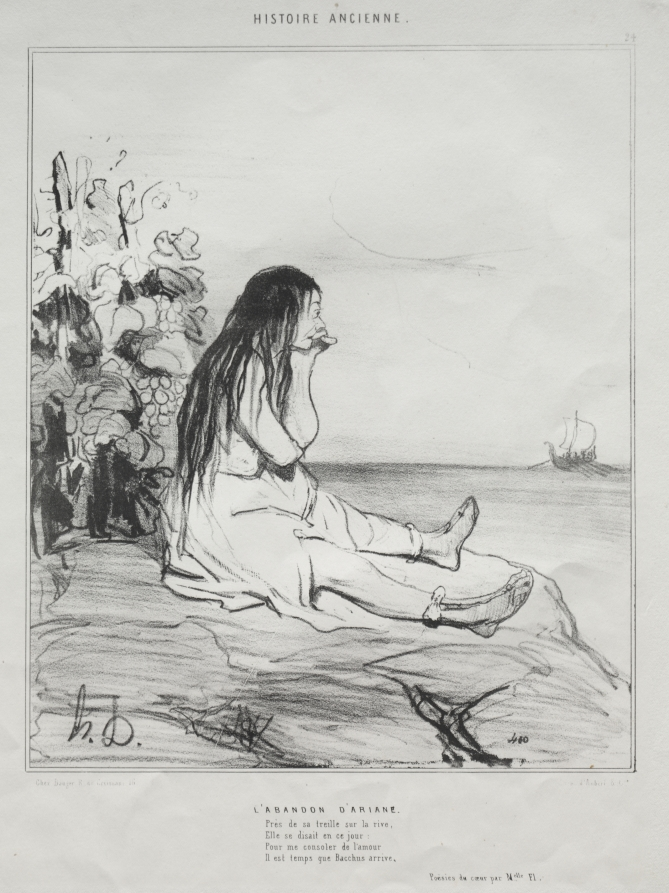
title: The Abandonment of Ariadne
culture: France, 19th century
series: Ancient History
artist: Honoré Daumier (French, 1808–1879)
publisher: Aubert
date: 1842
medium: lithograph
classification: Print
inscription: Upper margin, in pencil: HD 1924 ; lower margin, printed: Chez Bauger, R. du Croissant, 16 / Imp. d'Aubert & Cie.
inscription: Above image, printed: HISTOIRE ANCIENNE. / 24 ; below image, printed: "L'ABANDON D'ARIANE. / Prés de sa treille sur la rive, / Elle se disait en ce jour: / Pour me consoler de l'amour / Il est temps que Bacchus arrive. / Poësies du coeur par Melle. Fl."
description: This print was published in Le Charivari (September 4, 1842) as plate 24 from the series Ancient History.